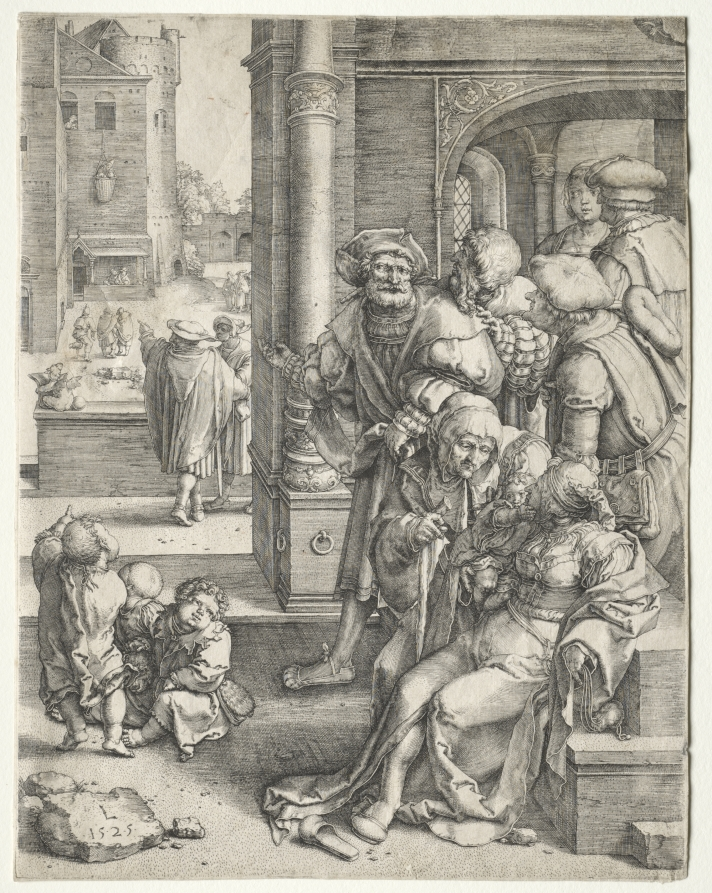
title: The Poet Virgil Suspended in a Basket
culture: Netherlands, 16th century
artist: Lucas van Leyden (Netherlandish, 1494–about 1533)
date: 1525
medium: engraving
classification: Print